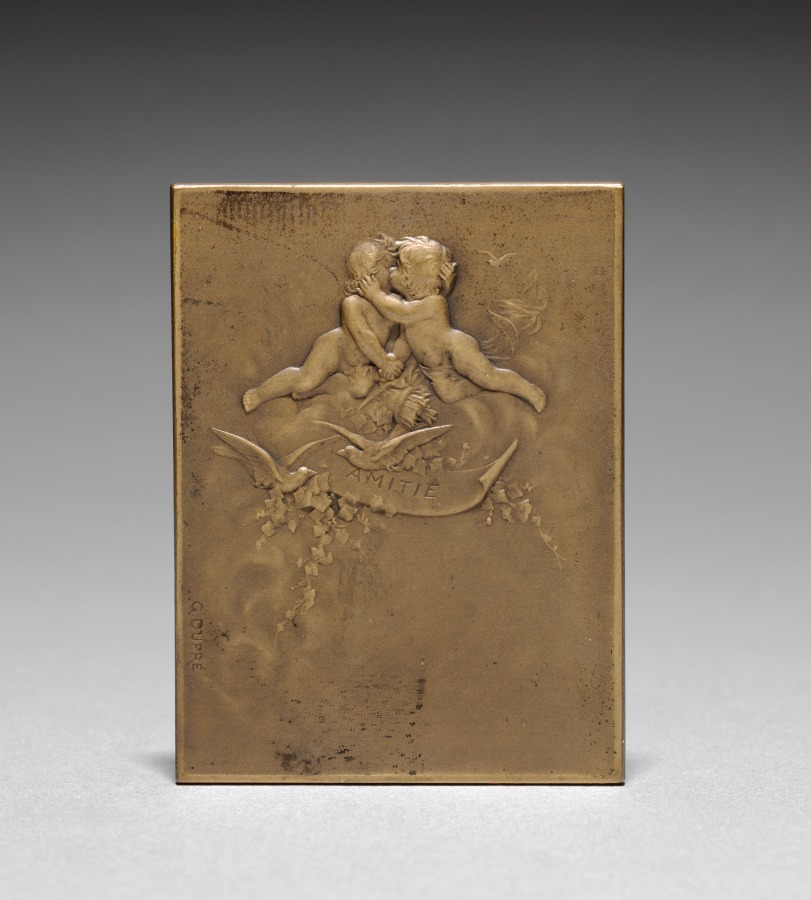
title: Medallion (reverse)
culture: France, 19th-20th century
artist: Jules Dupré (French, 1811–1889)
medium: bronze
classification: Metalwork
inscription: "AMITIÉ"; signed: "G. Dupré."